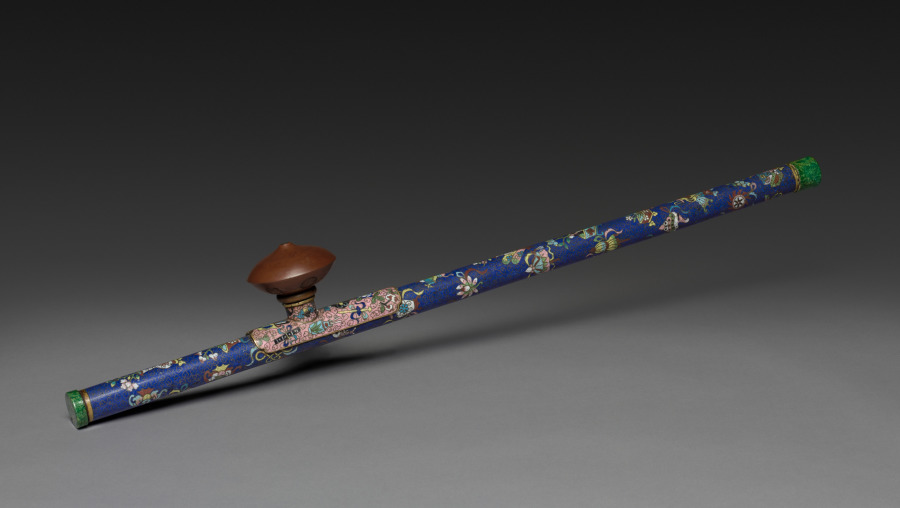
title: Opium Pipe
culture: China, Qing dynasty (1644-1911)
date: 1800s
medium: cloisonné enamel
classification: Miscellaneous